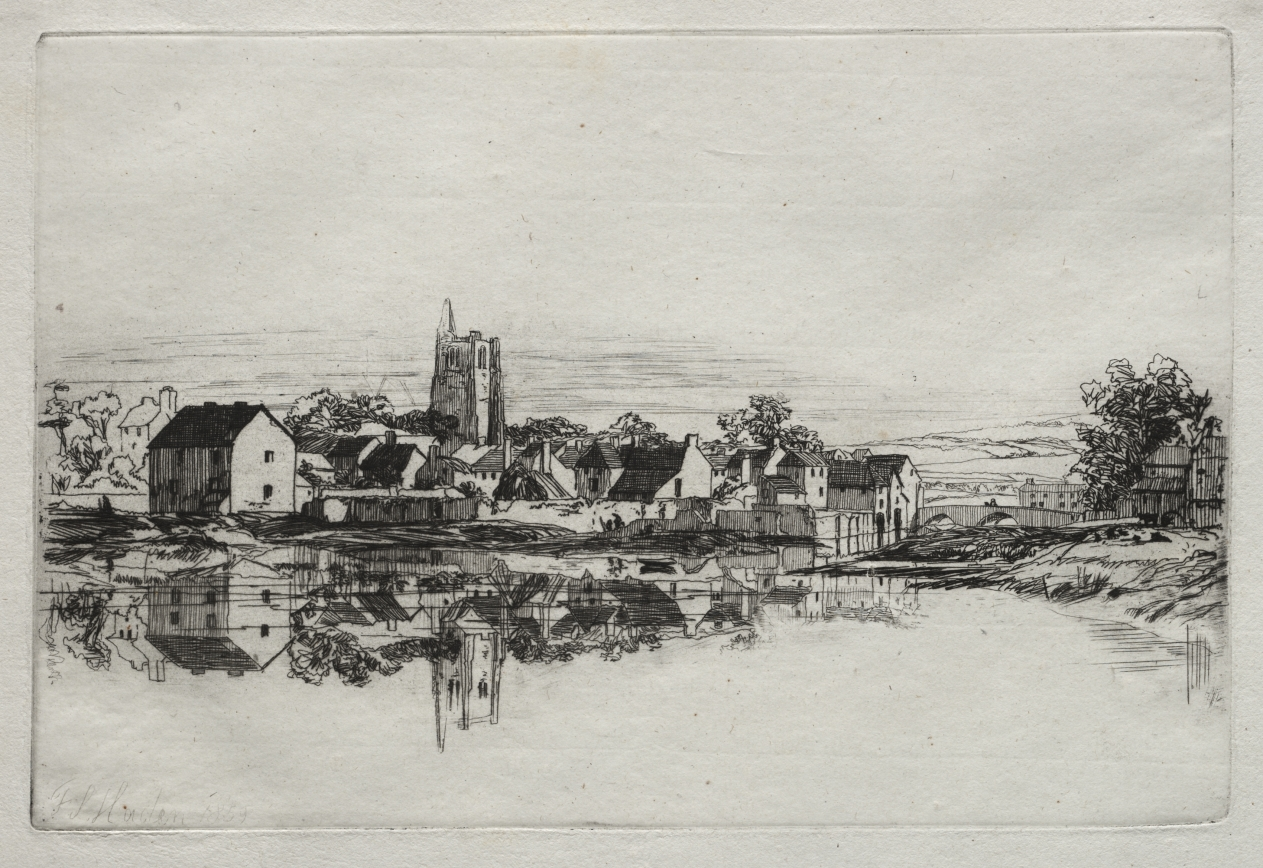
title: Kidwelly Town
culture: England, 19th century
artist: Francis Seymour Haden (British, 1818–1910)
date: 1859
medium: etching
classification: Print